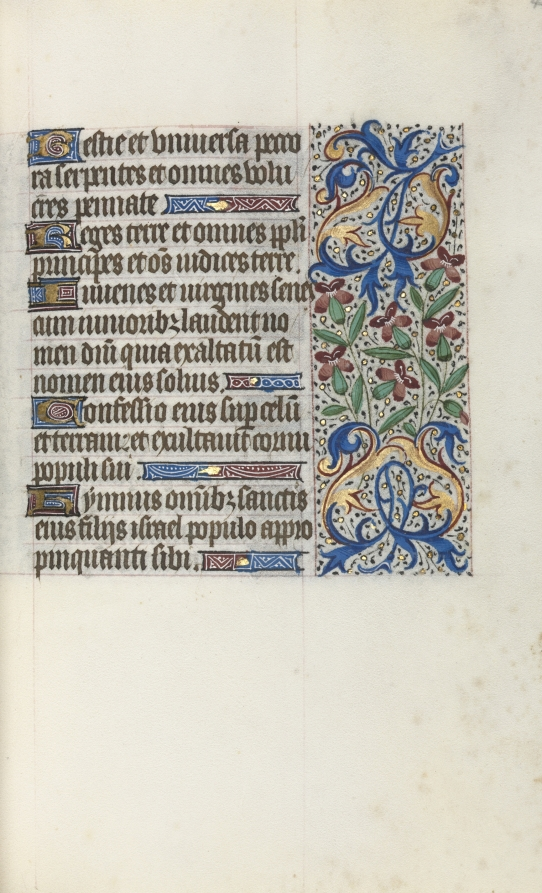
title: Book of Hours (Use of Rouen)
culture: France, Rouen, 15th century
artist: Master of the Geneva Latini (French, active Rouen, 1460–80)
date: c. 1470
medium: ink, tempera, and gold on vellum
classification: Bound Volume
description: In the late 1400s and early 1500s Rouen was an established and important center of book production. The city’s cathedral had a wealthy chapter that spent large sums of money to commission books and to maintain its extensive library. The stationers and booksellers would have likely been concentrated in or near the cathedral precinct. This artist, named after a manuscript now in Geneva, was Rouen’s principal illuminator during the second half of the 1400s.